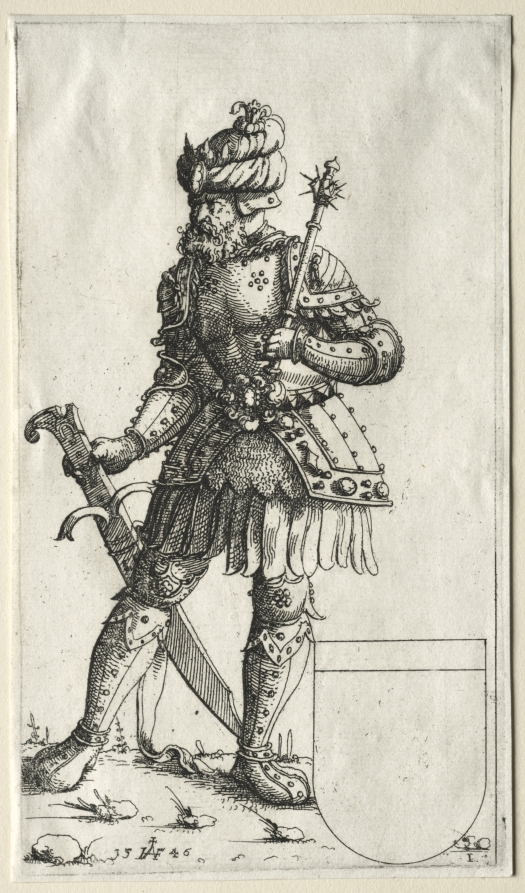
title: Sigismund II, King of Poland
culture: Germany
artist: Augustin Hirschvogel (German, 1503–1553)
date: 1546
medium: etching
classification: Print